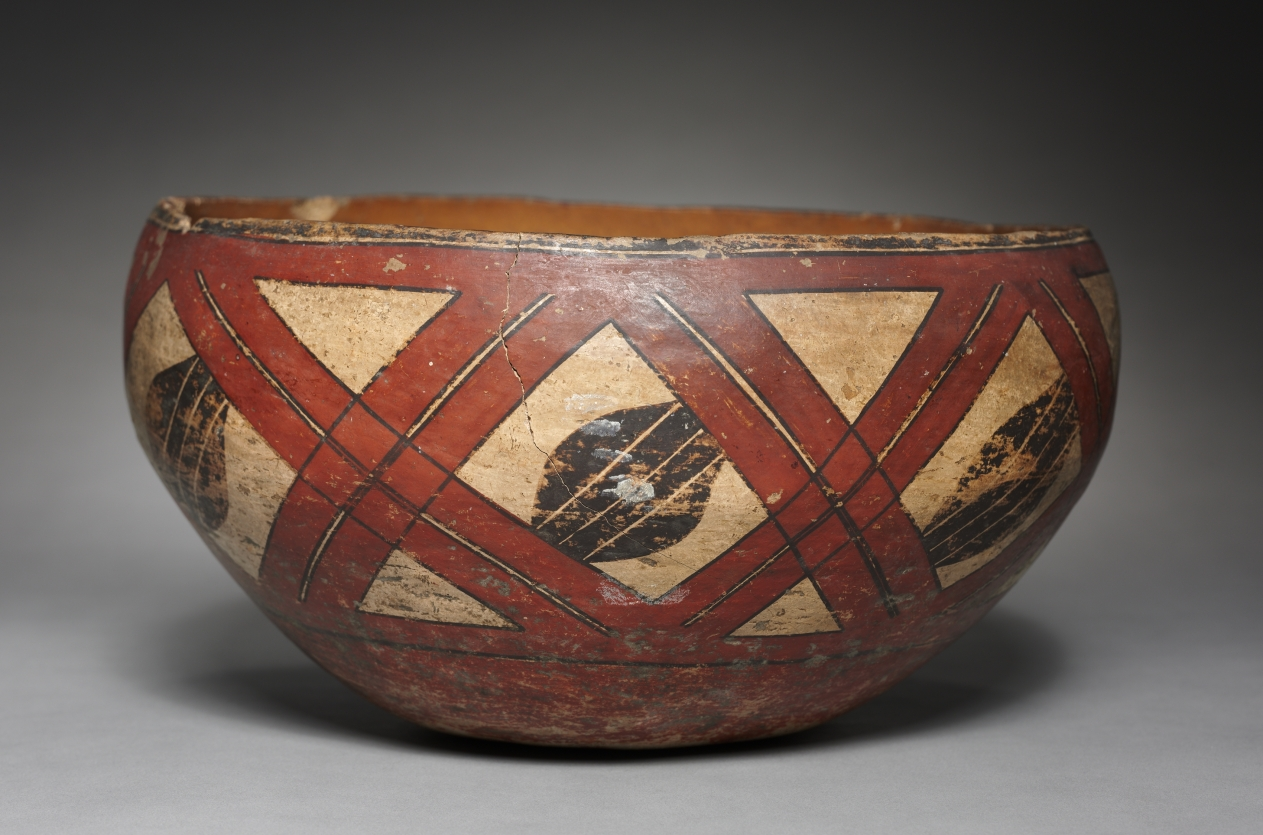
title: Stew Bowl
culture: Southwest,Pueblo, Acoma, Post-Contact Period, 20th century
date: 1860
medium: ceramic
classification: Ceramic